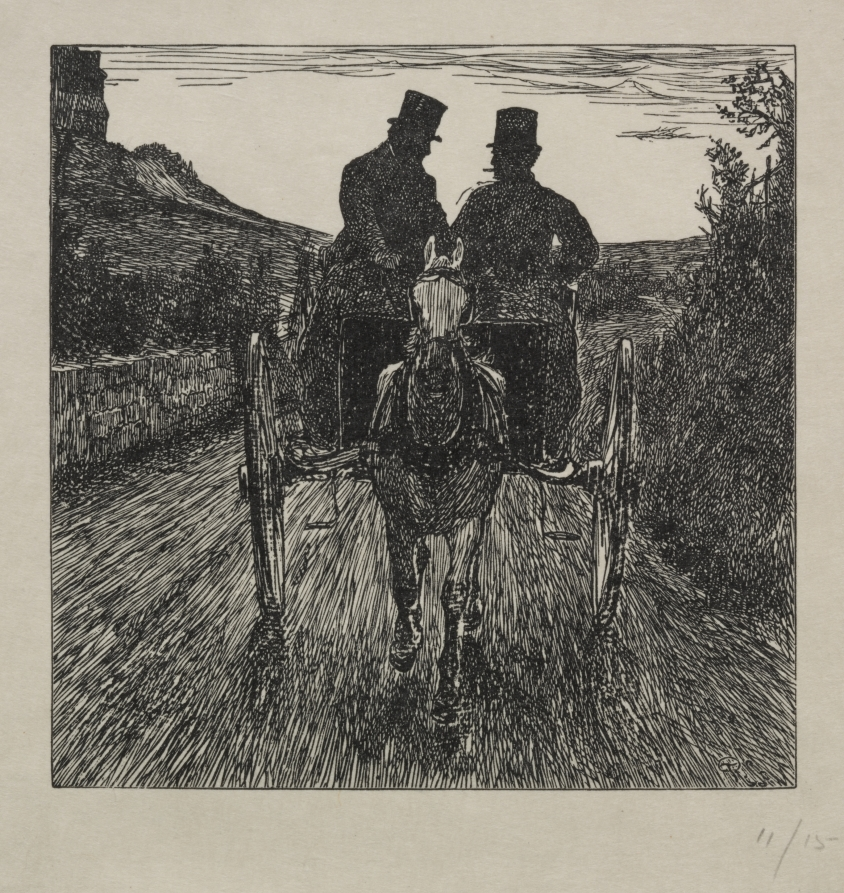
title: Why the Pifflers Lost their Return Match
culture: England, 19th century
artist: George Louis Palmella Busson Du Maurier (British, 1834–1896)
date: 1865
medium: wood engraving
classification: Print